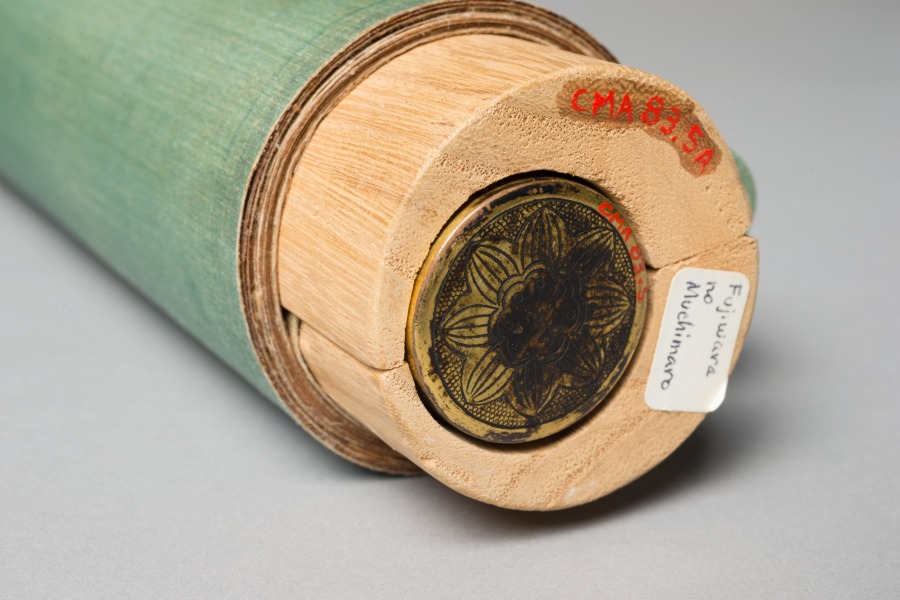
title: Fujiwara no Muchimaro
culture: Japan, Kamakura period (1185–1333)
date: 1200s or 1300s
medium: Hanging scroll; ink, color, gold, and cut gold on silk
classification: Painting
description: This portrait of Fujiwara no Muchimaro (680–737), a grandson of Fujiwara no Kamatari (614–669), includes an image of Buddha Dainichi Nyorai above his head. By situating the image of Dainichi there, this painting would seem to assert that Muchimaro is an avatar of Dainichi. In the same way that kami could be identified with Buddhist counterparts, powerful humans could also be seen as manifestations of Buddhist deities. A similar painting is at Eizanji in Nara, of which Muchimaro is known as the founder. It was once a branch temple of Kōfukuji, the Fujiwara family temple.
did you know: The boughs of wisteria appearing in the background symbolize the figure's status as a Fujiwara family member.